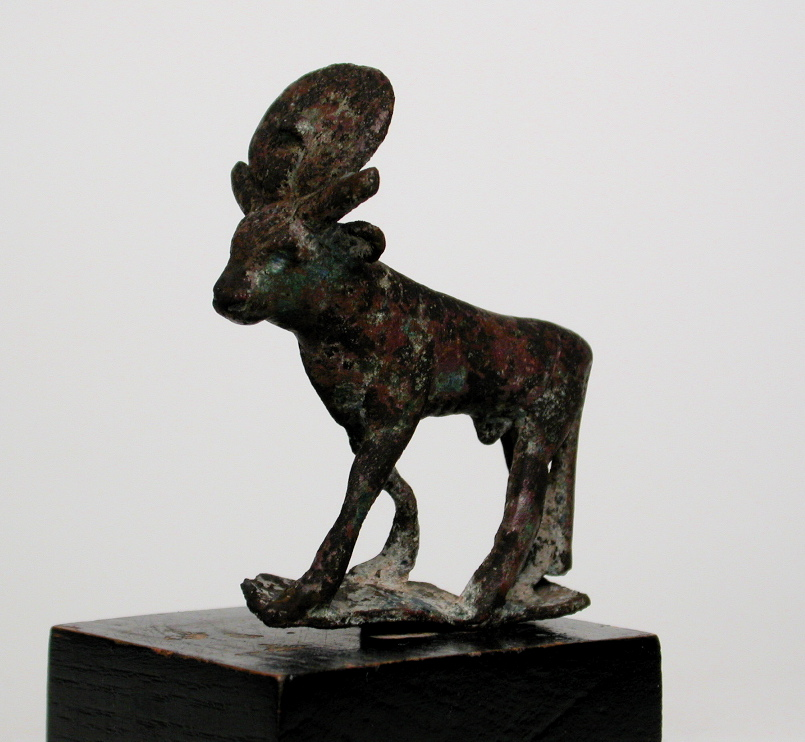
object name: Sculpture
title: Statuette of the Apis Bull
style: third intermediate period, egyptian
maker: Egyptian; Saqqara, Egypt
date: Third Intermediate Period–Late Period, Dynasty 21–26 (about 1069–664 BCE)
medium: Bronze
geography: Egypt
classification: statuette; bronze; metal; sculpture; ancient art